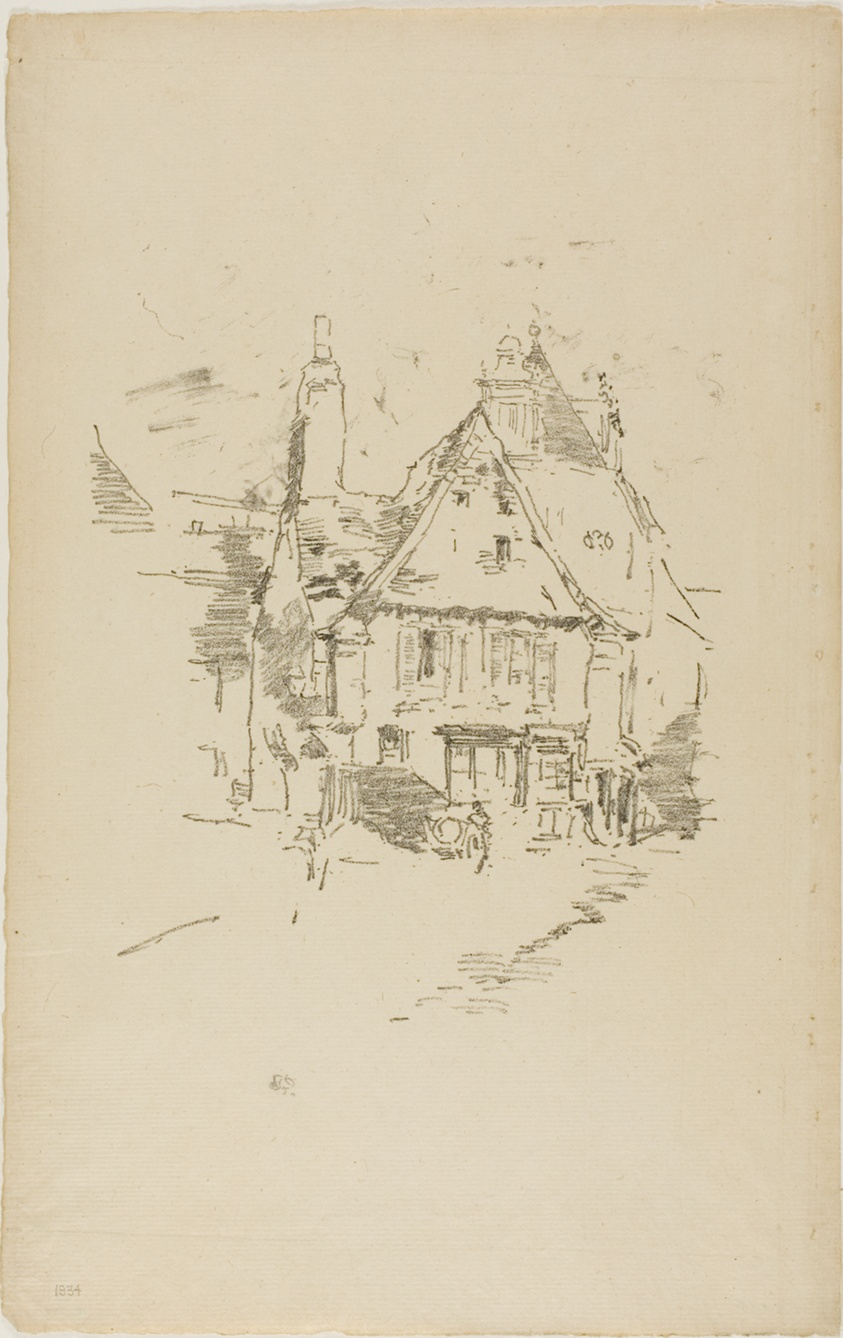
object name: Print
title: Gabled Roofs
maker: James McNeill Whistler (American, 1834-1903)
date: 1893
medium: Transfer lithograph in black with stumping, on cream laid paper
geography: United States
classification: transfer lithograph; lithograph; print; prints and drawing; paper